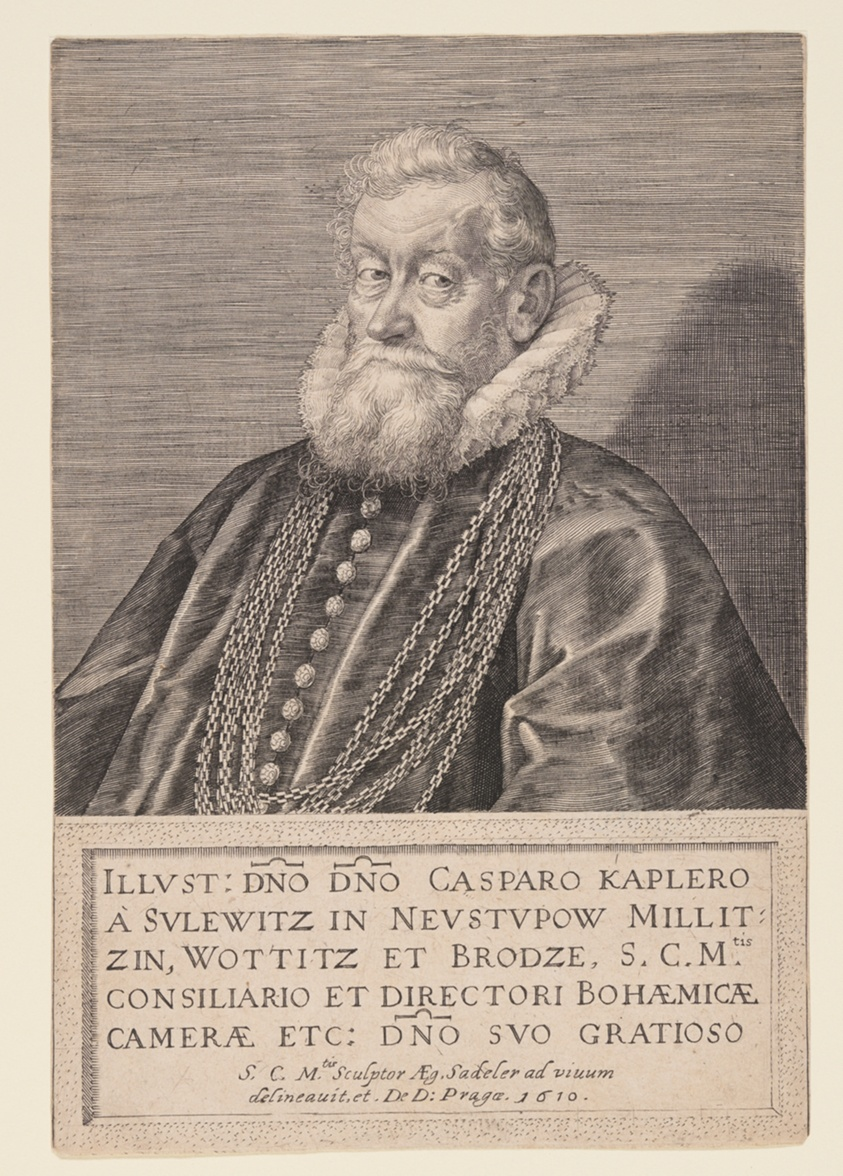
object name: Print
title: Gaspard Kaplir von Sulewitz, Councilor to the Emperor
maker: Aegidius Sadeler II; Flemish, c. 1570–1629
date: 1610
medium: Engraving on paper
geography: Flanders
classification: engraving; paper; print; prints and drawing